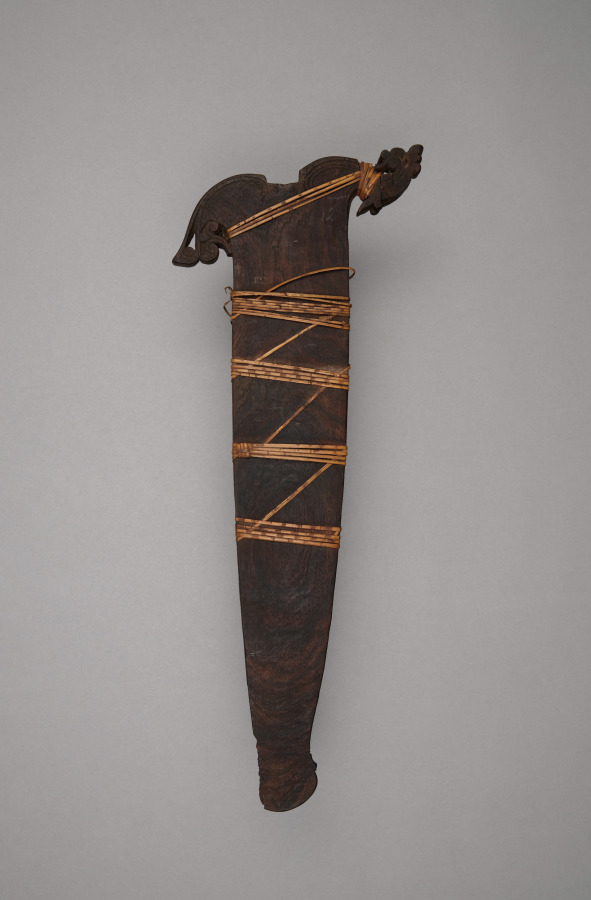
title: Scabbard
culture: Philippines, Mindanao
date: 1800s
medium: Wood with rattan strips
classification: Arms and Armor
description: The flared form of this wooden scabbard indicates that it was made to house a barong blade that would have belonged to members of a Muslim group in the southern Philippines, the Maranau, Tausug, or Yakan. The upper section features incised scroll-like motifs, similar to the stylized floriate designs common in southern Philippine okir carving traditions. Several bands of rattan lashings reinforce the sheath, adding both structural stability and decorative rhythm.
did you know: The scrolling motifs traveled with Islamic people by way of maritime trade.